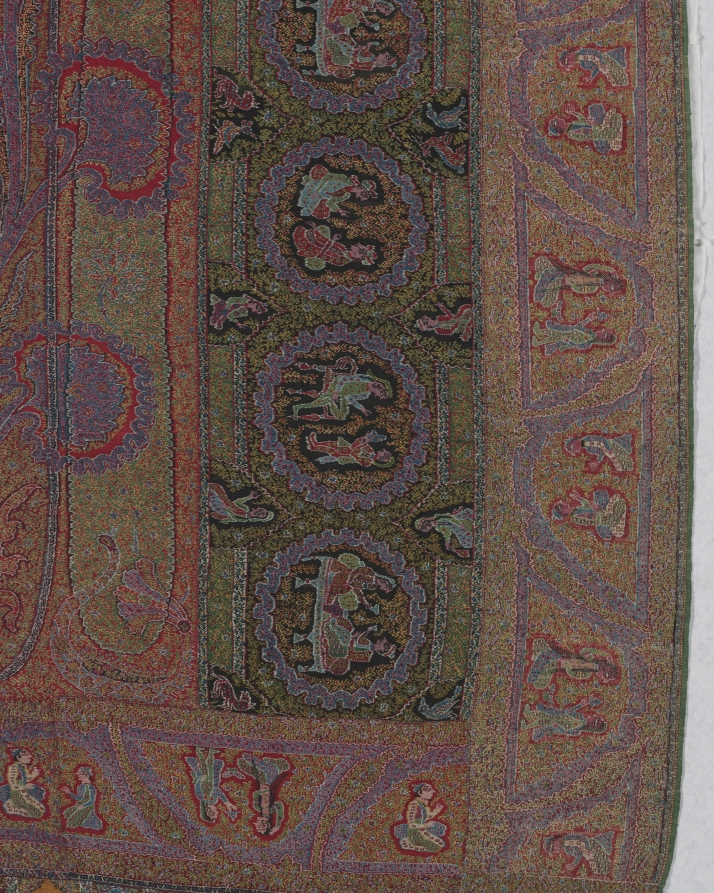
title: Long shawl with woven figures and animals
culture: India, Kashmir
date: c. 1885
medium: 2/2 twill tapestry weave, double interlocked and pieced: wool (possibly pashmina)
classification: Textile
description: Kashmir shawls from India were status symbols in Europe during the 1800s, and few are as rare as this woven example. Over 200 human figures take part in drinking, smoking, dancing, and falconry in the Indian princely scenes that enliven the shawl’s borders and four dark stripes. The stripes alternate with large elongated boteh, or paisley, motifs that intertwine with blossoming stems in a European style adapted by Kashmiri textile artists. This extraordinary woven shawl was probably made to dazzle the jury at one of the European expositions of industrial products, as almost all other figural shawls were embroidered. It was woven in many pieces and then skillfully joined with colorful harlequin end borders.